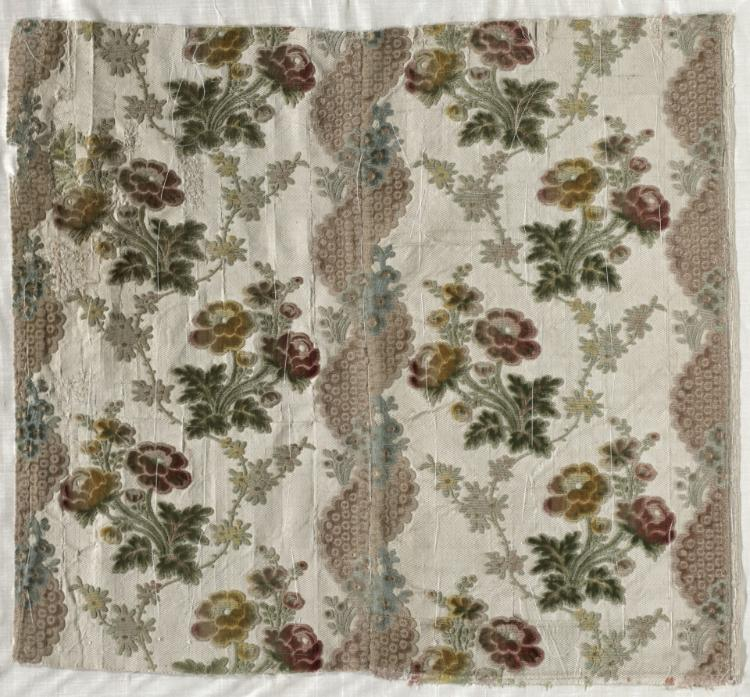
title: Velvet Fragment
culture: Italy, 18th century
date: 1700s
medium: velvet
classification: Velvet